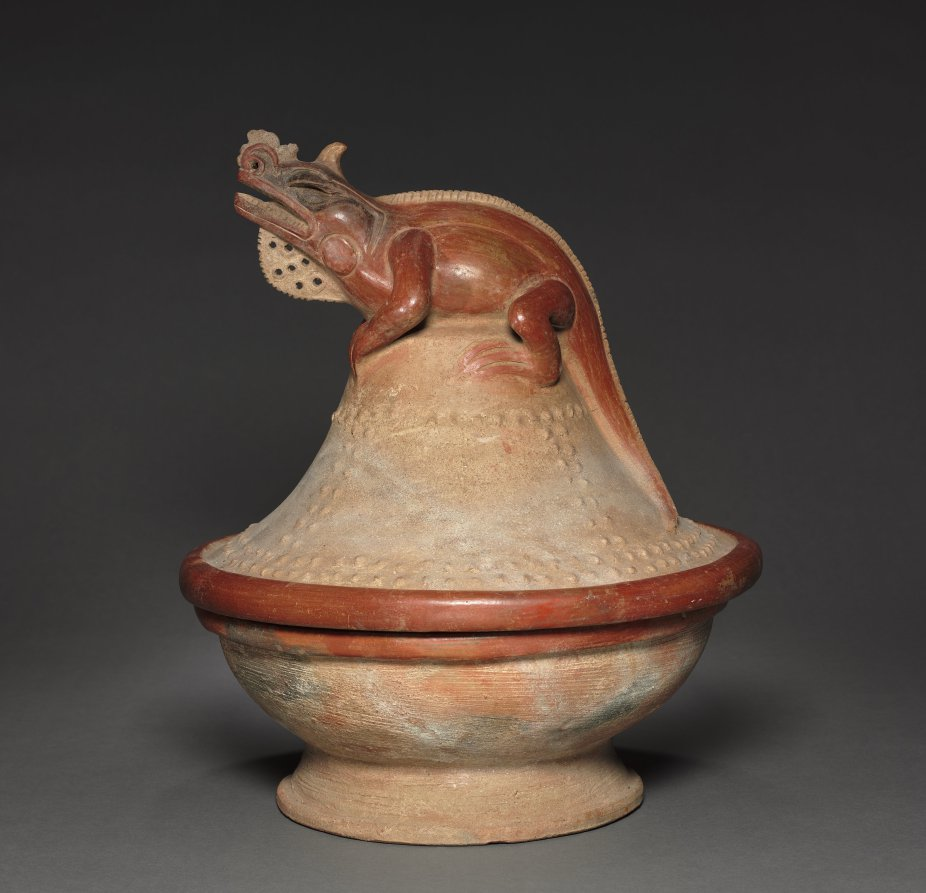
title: Lidded Bowl with Iguana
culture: Costa Rica, Southern Nicoya region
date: c. 600–1100 (Thermoluminescence date, 995–1395)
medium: ceramic, slip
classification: Ceramic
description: At the time of the Spanish conquest in the 16th century, Costa Rican mythology linked iguanas to the sky and to rulers. The earlier makers of this vessel left no written records, but they may have had similar beliefs. The lizard poses as though basking in the sun, a celestial body, and assumes an aggressive stance that could be likened to a ruler's: the teeth and chin under the dewlap are displayed, Also, fine ceramics like this were buried in the graves of the high-status dead, some of them certainly leaders of the several groups that competed in the area.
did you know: Green iguanas can grow to be over 6 feet long.